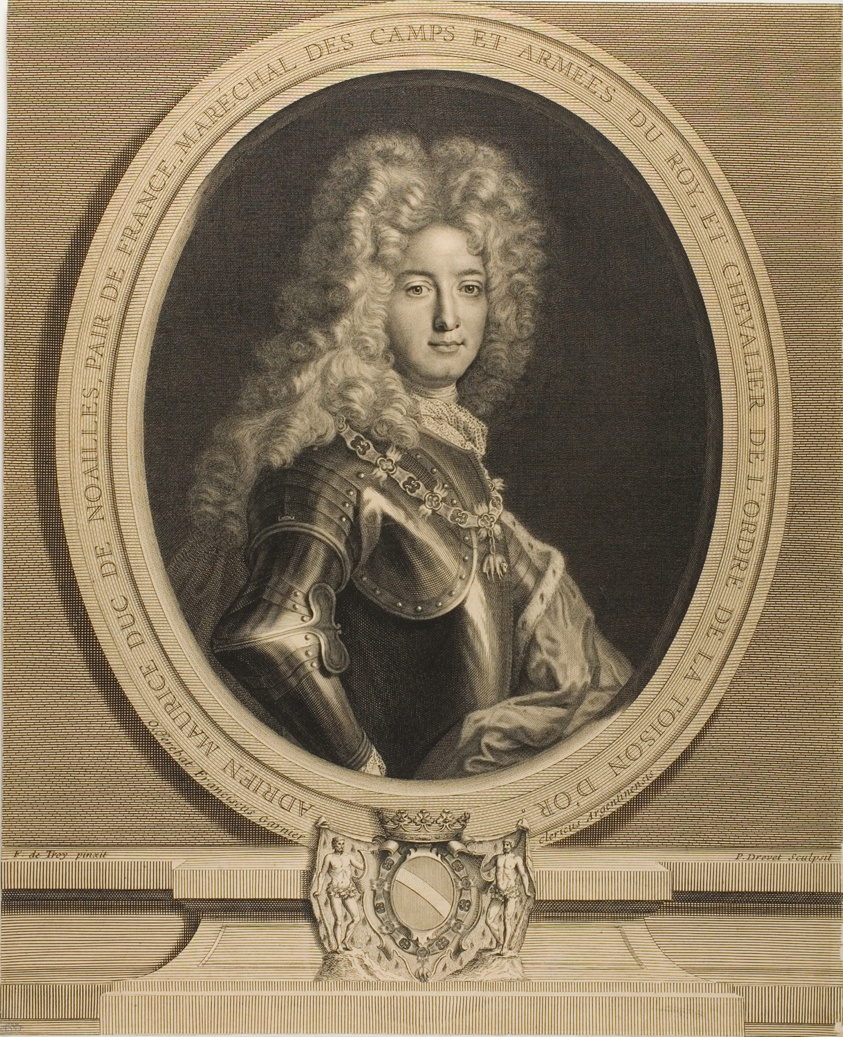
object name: Print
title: Portrait of Adrien-Maurice, Duke of Noailles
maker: Pierre Drevet (French, 1663-1738); after François de Troy (French, 1645-1730)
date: 1721; printed posthumously after 1780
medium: Engraving on tan wove paper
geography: France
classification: engraving; print; prints and drawing